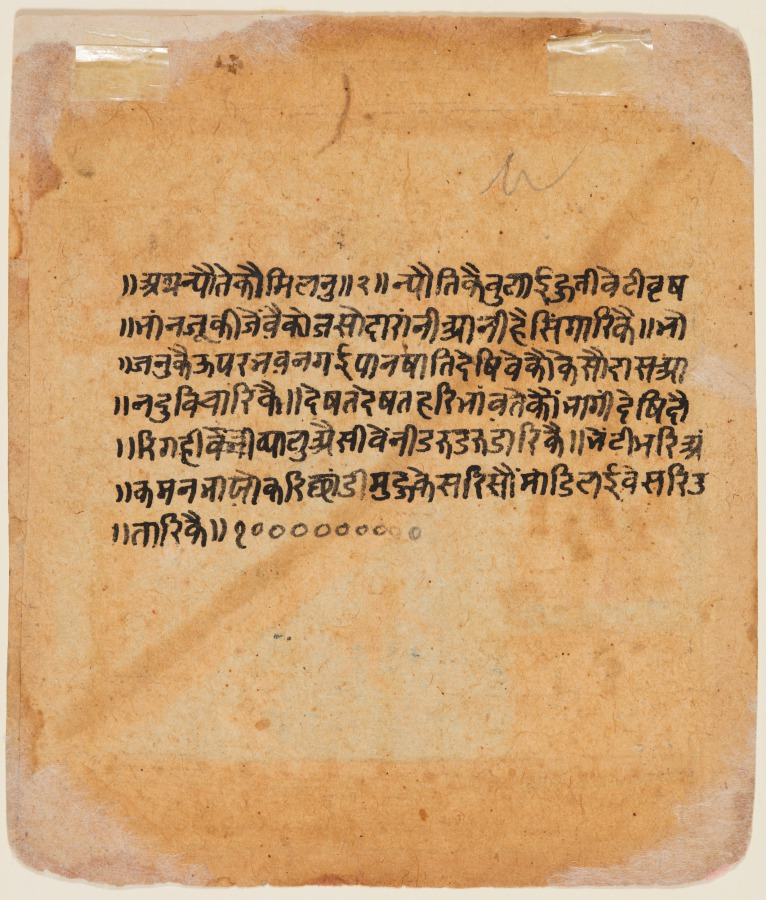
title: Krishna and the Cowherds Dive into the River, from a Rasikapriya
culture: Central India, Madhya Pradesh, Malwa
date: c. 1640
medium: gum tempera, ink, and gold on paper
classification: Painting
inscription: atha nyaute kau milnu.2. nyauti kai bulaī hutī betī vṛṣabhānajū kī, jeṃvai kau jasodā rānī ānī hai siṃgārikai. bhojanu kai ūpara bhavana gāi pāna khāti dekhive kau ke sauda sa ānadu vicārikai. dekhata dekhata hari bhavate koṃ bhāgi dekhi. dauri gahī vyalu aisī veṃnī daru daru darikai. bheṃti bhari anka mana bhāyau kari chaṃdi muhu kesari sam mādi laī besari utārike. 1000000000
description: Krishna and seven cowherds (gopas) playfully jump into a river, depicted as a wavy tricolor band that divides the composition diagonally in half. Krishna and four others are already airborne, while three get ready to jump. Radha and her friends witness this feat in amusement from a marble platform. The milkmaids are fully dressed, while Krishna and the cowherds are wearing kaupina loincloths.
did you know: The boys are shown in subtly different sizes to convey their movement through space.